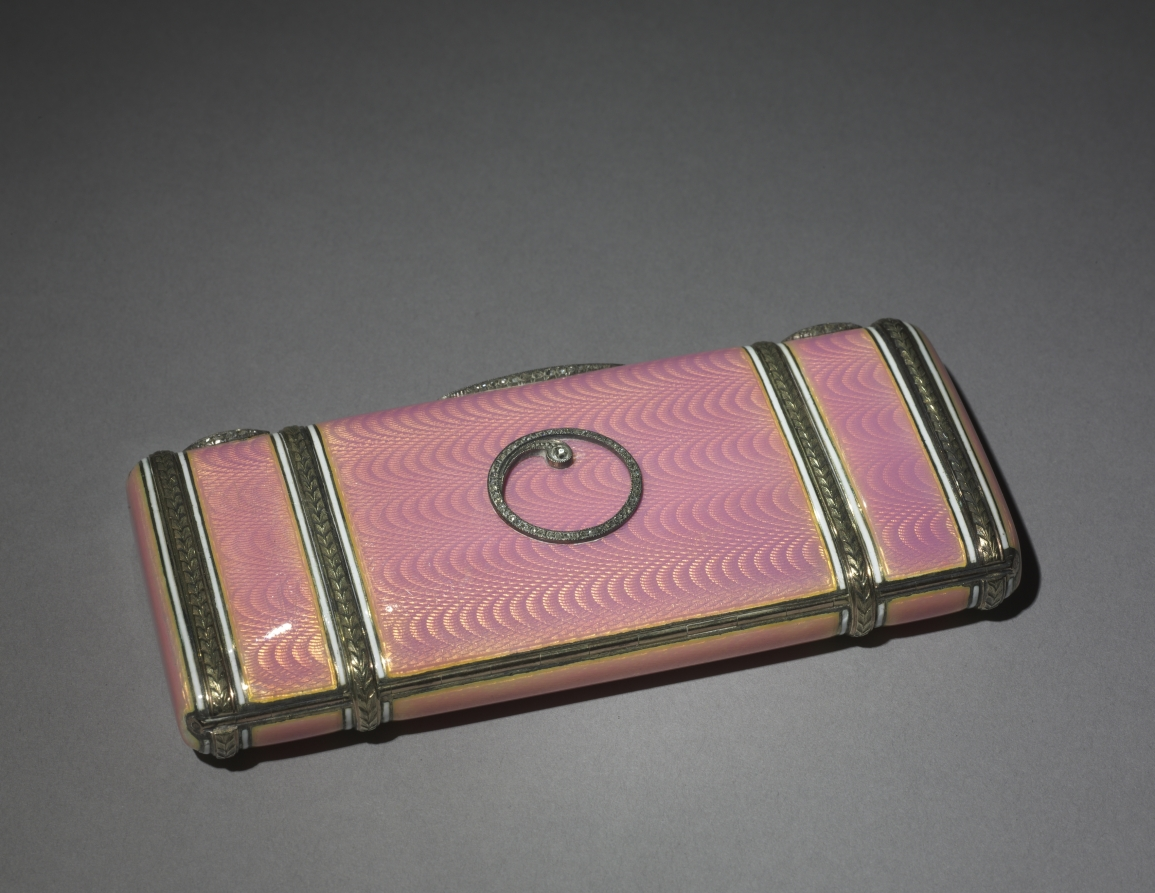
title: Vanity Case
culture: Russia, St. Petersburg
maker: House of Fabergé (Russian, 1842–1918)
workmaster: Henrik Wigström (Russian, 1862–1923)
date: after 1903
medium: silver box with gold borders and silver gilt interiors, enamel over engine turned ground, diamonds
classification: Miscellaneous